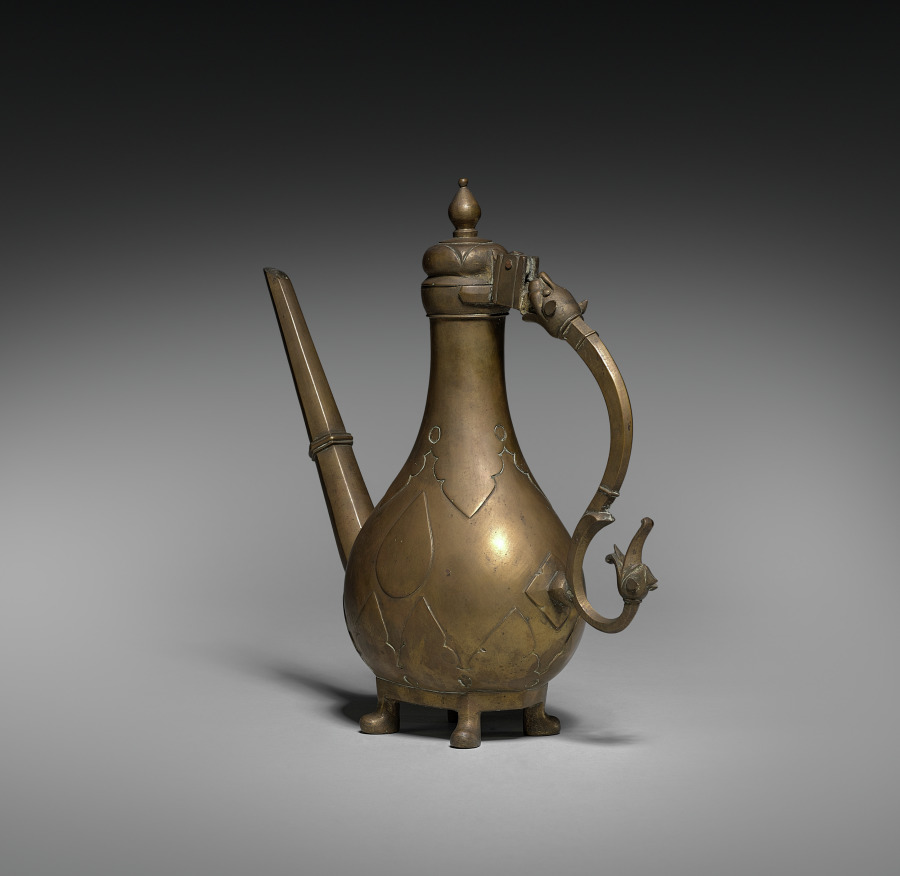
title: Vessel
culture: India, Benares, 19th century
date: 1800s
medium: brass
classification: Metalwork